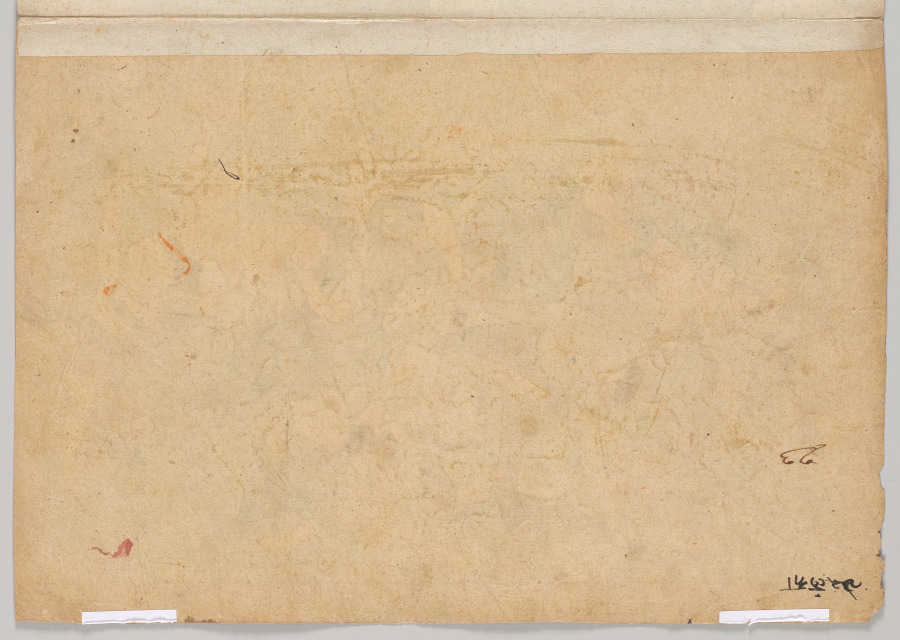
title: Battle between monkeys and demons, from the “Shangri” Ramayana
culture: Northern India, Pahari kingdoms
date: c. 1700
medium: Gum tempera and ink on paper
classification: Painting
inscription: Verso: in Devanagari 92 Laṃka; in Takri: 92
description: When the demon Ravana refused to return Sita to her husband, the divine hero Rama, Ravana sent his army to attack Rama. Rama’s army, made up mainly of monkeys from the forest, fought valiantly using only trees and rocks. The artist creates a tapestry of color and form to convey the confusion of battle.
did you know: Some of the monkeys bare their teeth in primal screams.